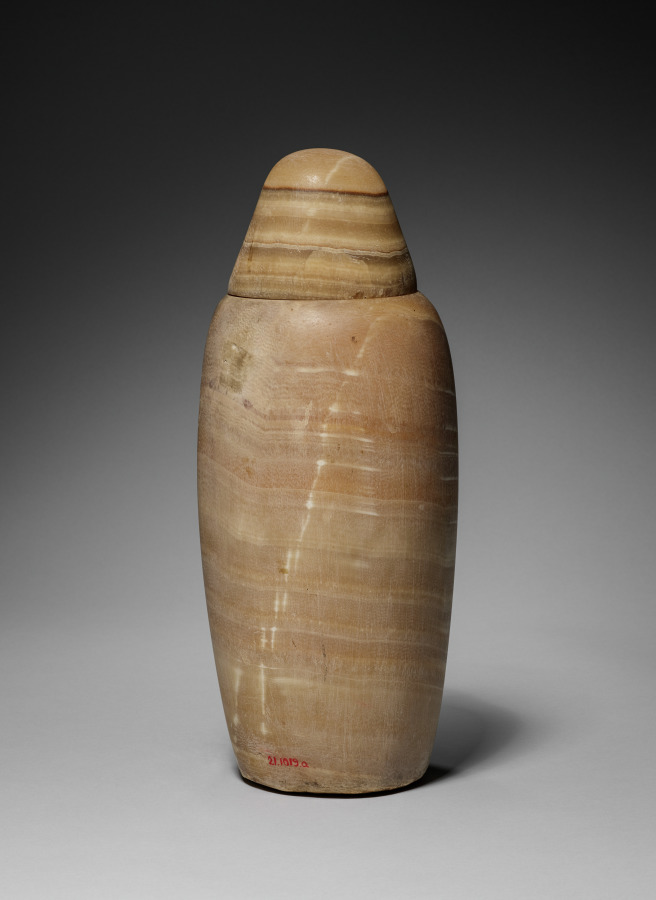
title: Canopic Jar with Man's Head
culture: Egypt, Late period (715–332 BCE), Dynasty 26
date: 664–525 BCE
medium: travertine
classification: Funerary Equipment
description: In the process of mummification, the liver, lungs, stomach, and intestines were removed, separately embalmed, and stored in specialized jars known as canopic jars (after a sailor in Greek mythology, who died at the town of Canopus in the Nile Delta and was worshipped there in the form of a human-headed jar). Each organ was identified with one of four funerary deities collectively known as the Sons of Horus: the liver with Imsety (man's head), the lungs with Hapy (baboon's head), the stomach with Duamutef (jackal's head), and the intestines with Qebehsenuef (falcon's head). It was their duty to protect the deceased and restore to him his body parts in the hereafter.